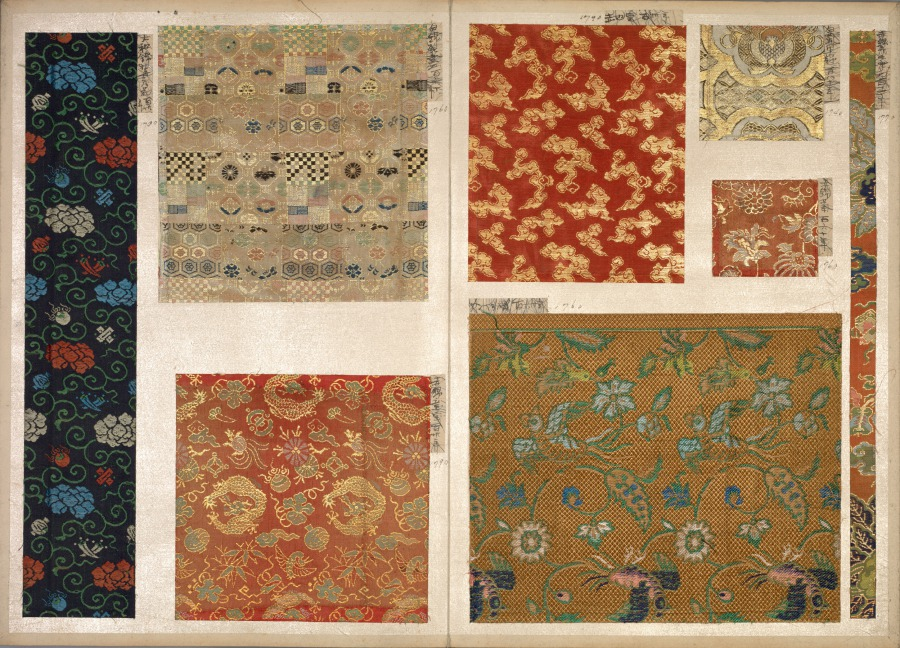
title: Album of Textile Samples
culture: Japan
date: 1790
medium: silk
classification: Textile